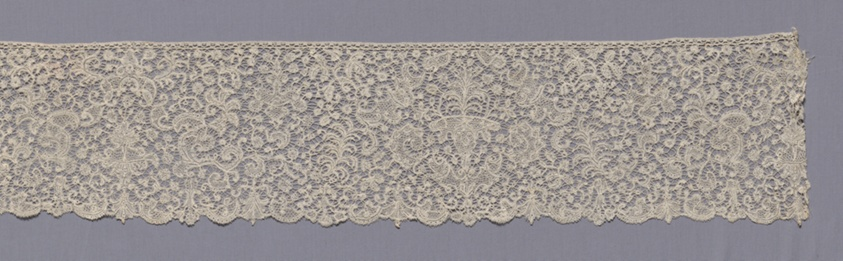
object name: Textile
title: Lace Flounce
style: 18th Century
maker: Flanders, Brussels (present day Belgium)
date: 1701-25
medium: Linen, bobbin part lace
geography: Flanders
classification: textile; lace - bobbin; lace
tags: fountains, cartouches, arabesque, vines